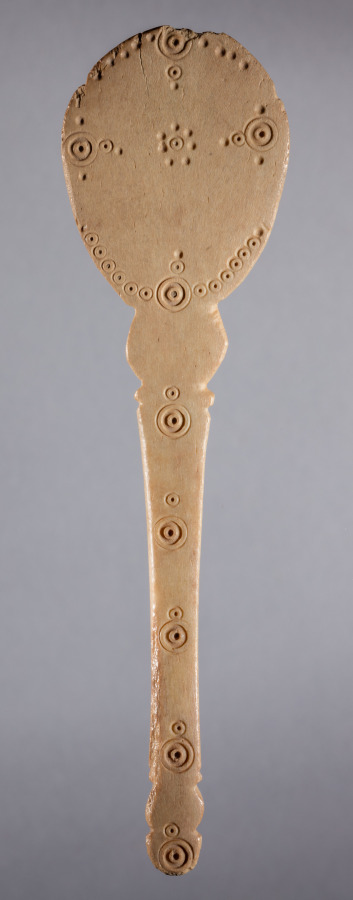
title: Bone Object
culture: Iran, early Islamic period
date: 700s - 900s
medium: bone, incised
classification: Miscellaneous